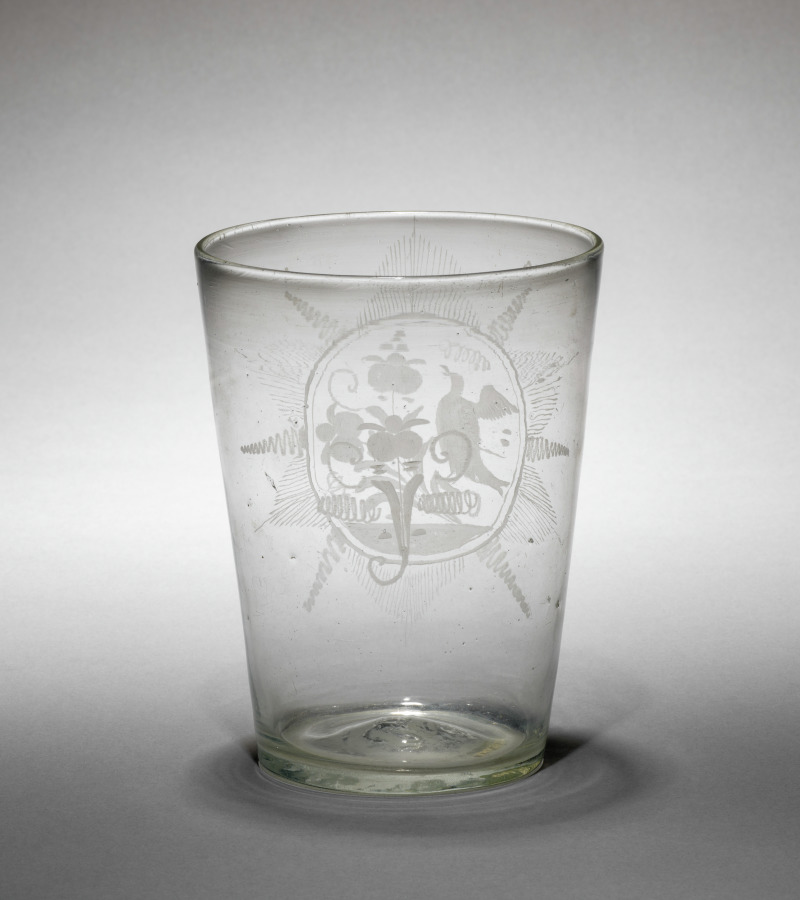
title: Flip Glass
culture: America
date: late 1700s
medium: glass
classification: Glass